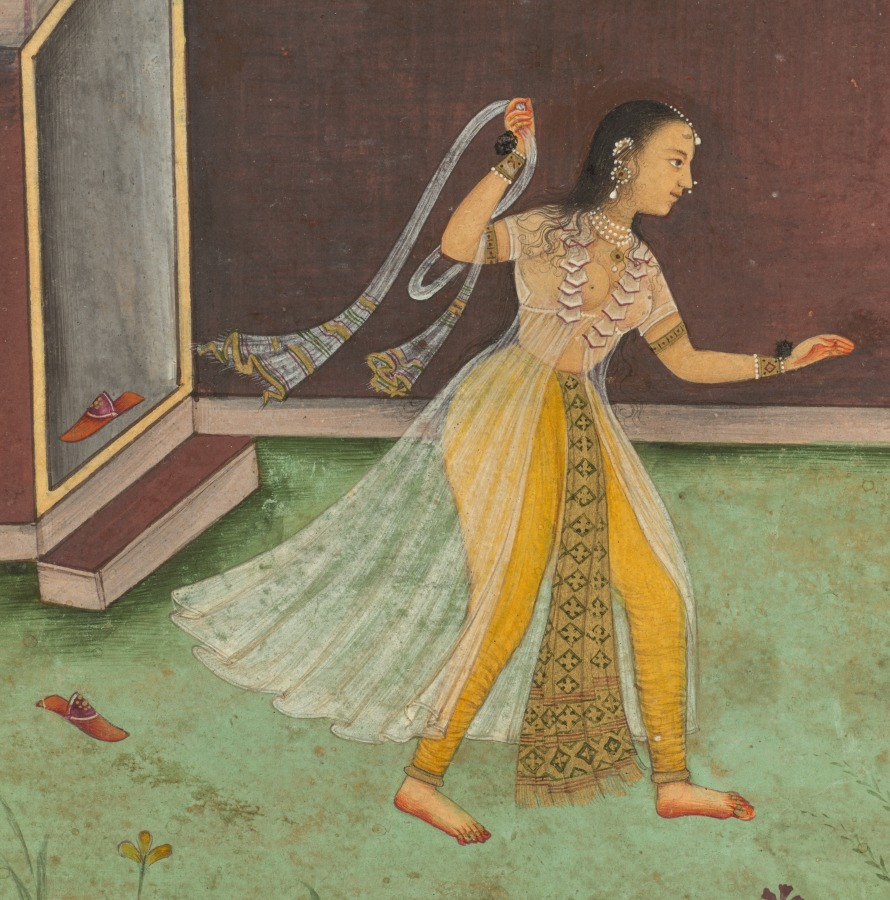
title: A House Burgled at Night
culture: Mughal India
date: c. 1700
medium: Gum tempera and gold on paper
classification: Painting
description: In this night scene a band of robbers have climbed over the walls of a Mughal house and, from a courtyard, are successfully carrying out the possessions of its owners while a lady flees through the door. The speed of her movement is expressed in the swinging motion of her diaphanous skirt and the scarf clutched in her hand, as well as by the shoes abandoned on the ground in her haste. This depiction of unruly behavior and its effects are perhaps an expression of the violent succession of emperors that threw the Mughal court into distress at the beginning of the 18th century.